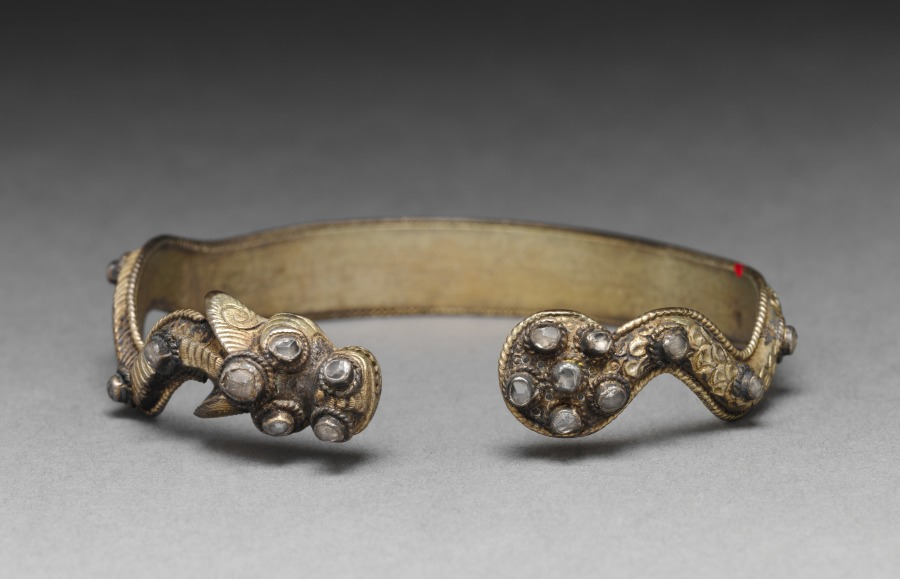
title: Bracelet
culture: Indo-Chinese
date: 1800s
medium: silver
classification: Jewelry